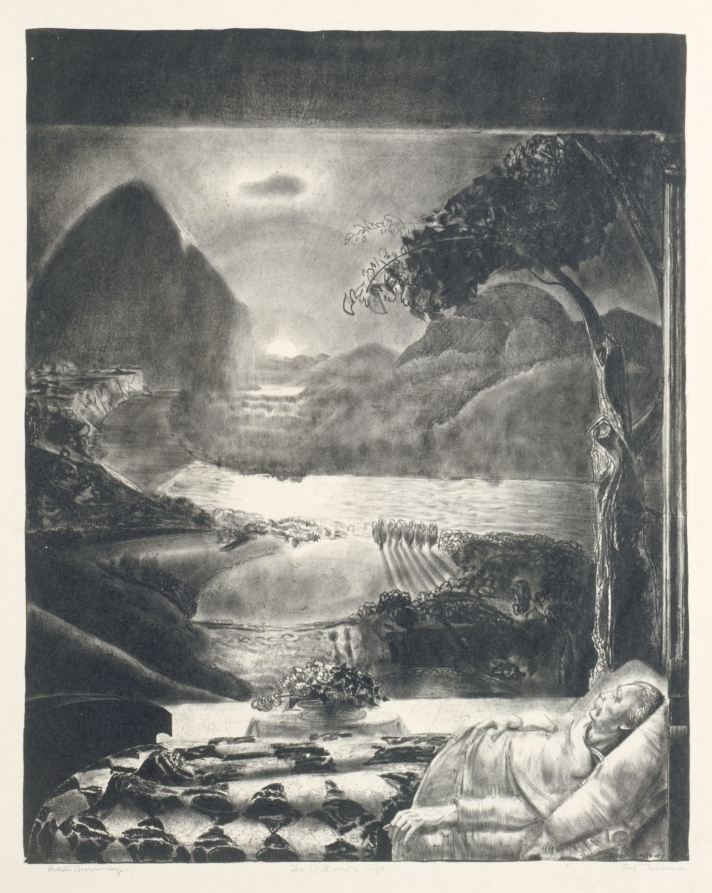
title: The Return to Life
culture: America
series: 11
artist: George Bellows (American, 1882–1925)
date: 1923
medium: lithograph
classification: Print